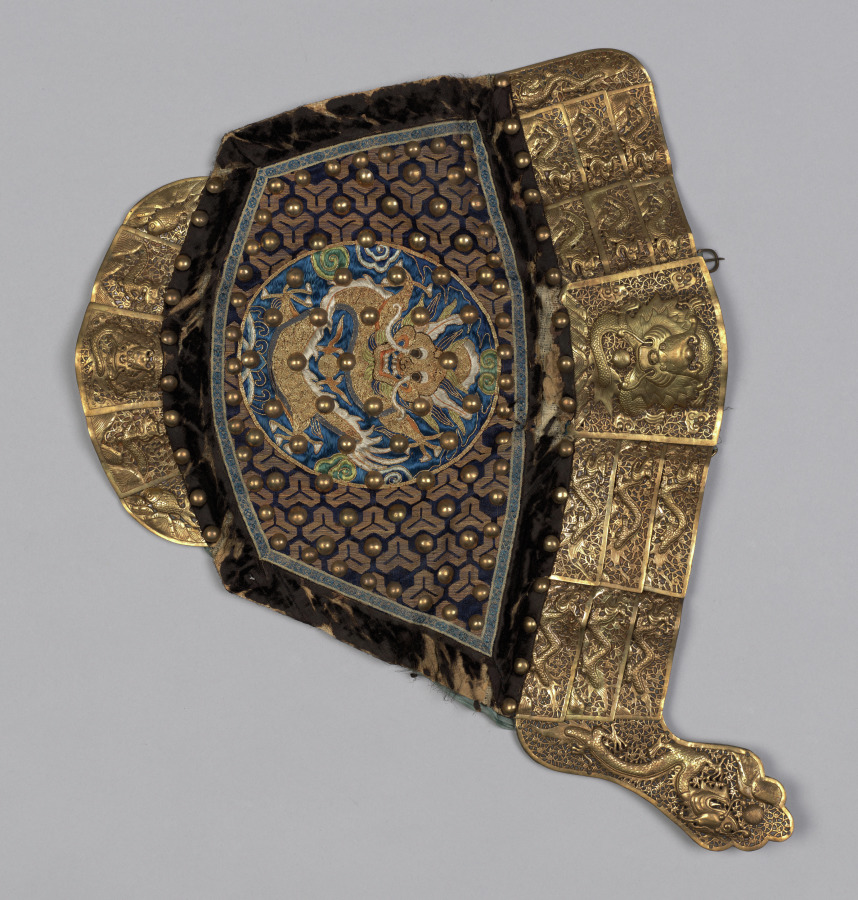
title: Ceremonial Uniform: Right Shoulder Flap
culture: China, Qing dynasty (1644-1911)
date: 1644–1911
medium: satin weave silk with gold metal thread embroidery; supplementary weft; black velvet; metal (brass?); lined in blue silk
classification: Arms and Armor